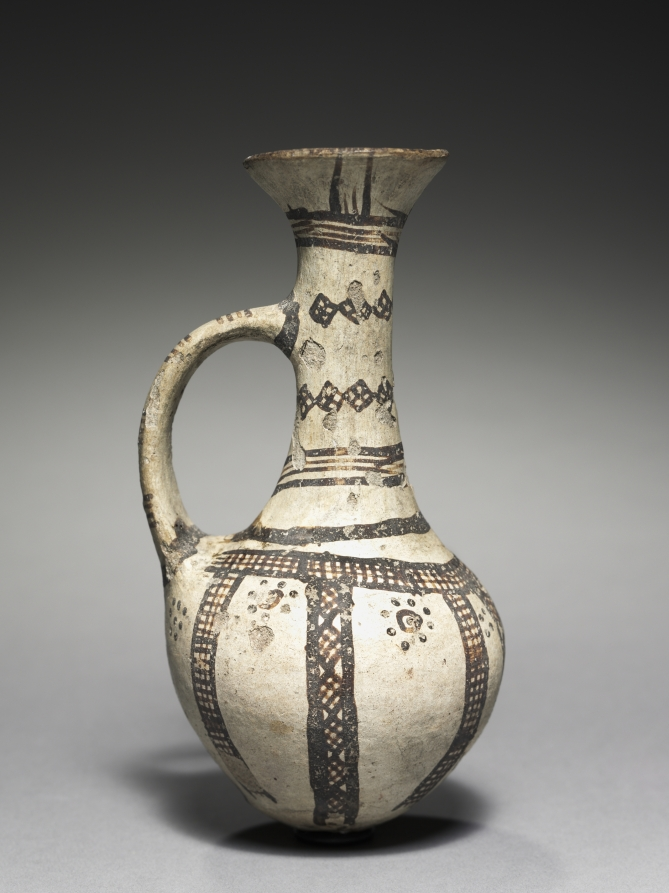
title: Jug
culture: Cyprus, late Cypriot II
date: c. 1450–1200 BCE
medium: white slip ware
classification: Ceramic